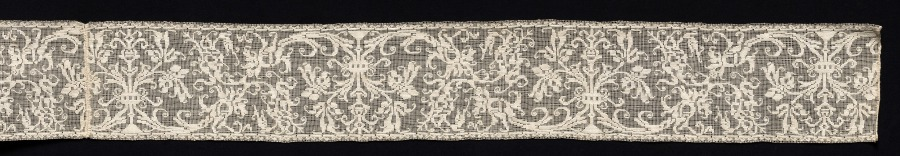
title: Band with Scroll Pattern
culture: Italy, Sicily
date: 1500s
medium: Bleached linen (est.): needle lace, burato (twined ground and darned in one direction)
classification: Lace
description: A scrolling vine with budding vegetation or a tendril is a recurring pattern in needle lace. The frequent use of the motif, adapted in lace from different centuries and regions, suggests that it was found in a pattern book. Here, the pattern is excessively ornate with additional swirling motifs and flourishing vases.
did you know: Books of patterns for lace making and other needlework were aimed at well-to-do women and girls to encourage domestic virtue.